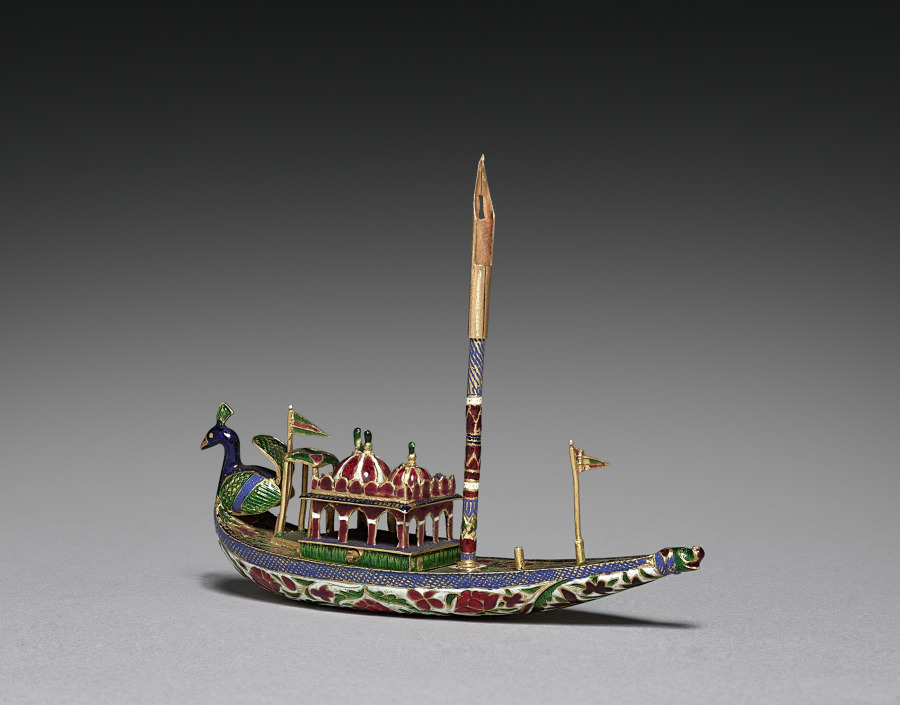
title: Inkstand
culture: Northwestern India, Rajasthan, Jaipur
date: 1800s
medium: Gold, silver, and enamel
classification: Jewelry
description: This enamel inkstand takes the fanciful form of a pleasure boat, linking the composing of poetry and the writing of calligraphy to the amusement of the senses. The luxurious materials and elegant form also indicate that scribal activities require a certain level of refinement. Cleverly, the enamelist placed a lotus design on the bottom of the vessel; as a flower that floats on water, the bloom represents both the water imaginatively splashing against the underside of the boat and the actual ink swishing inside the bilge. This inkstand was purchased by Cleveland Museum of Art founder Jeptha Homer Wade II (1857–1926) and his wife Ellen Garretson Wade (1857–1917) as they made a tour of India on their own pleasure boat, the Wadena.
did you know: The silver core of this inkwell has been covered in gold leaf.